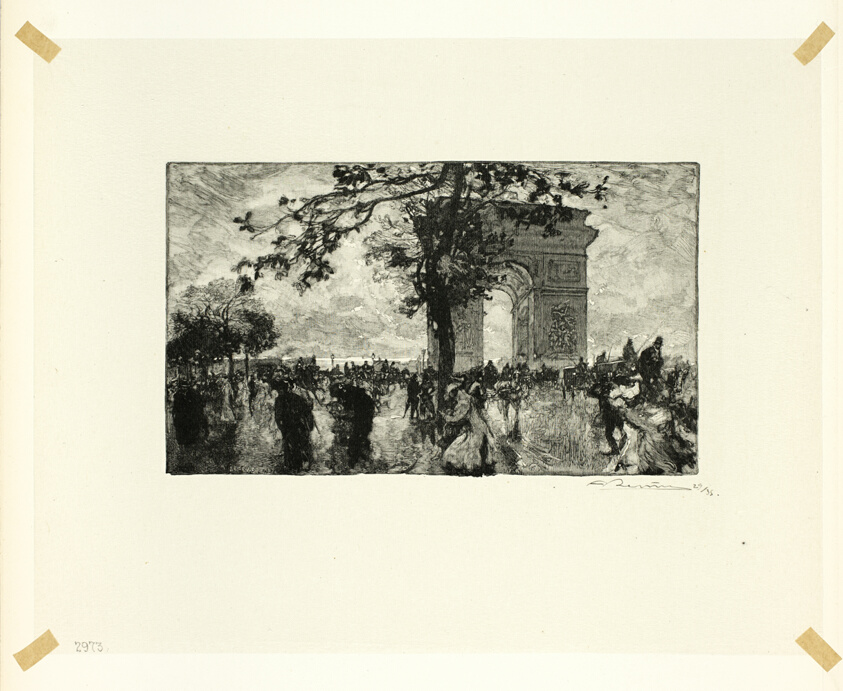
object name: Print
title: Retour du Bois, place de l'Etoile, plate nineteen from Le Long de la Seine et des Boulevards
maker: Louis Auguste Lepère (French, 1849-1918); published by A. Desmoulins (French, active c. 1908-1910)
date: 1890, published 1910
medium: Wood engraving in black on cream Japanese tissue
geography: France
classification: wood engraving; print; prints and drawing